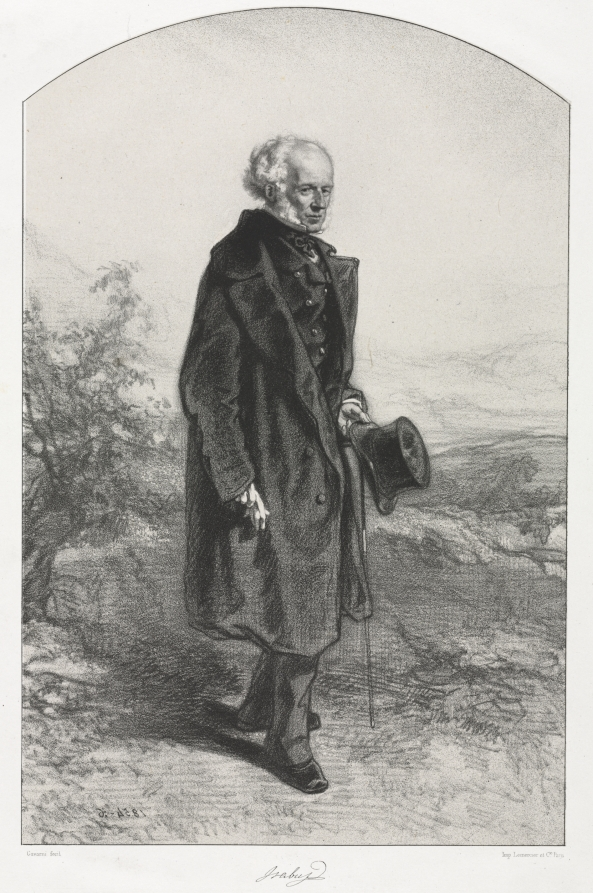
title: Jean Baptiste Isabey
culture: France, 19th century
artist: Paul Gavarni (French, 1804–1866)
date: 1854–1856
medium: lithograph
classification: Print